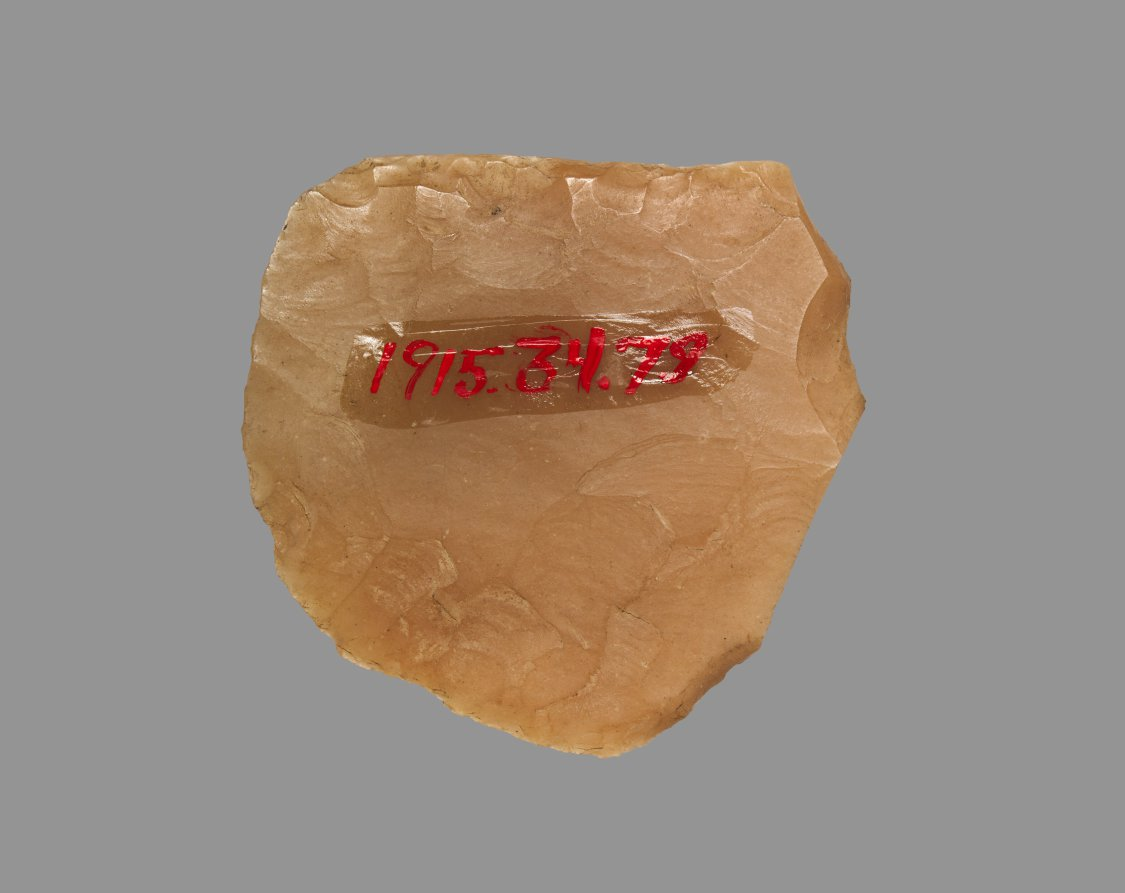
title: Sickle Blade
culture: Egypt, Middle Kingdom (2040–1648 BCE), Dynasty 12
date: 1980–1801 BCE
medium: flint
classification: Implements